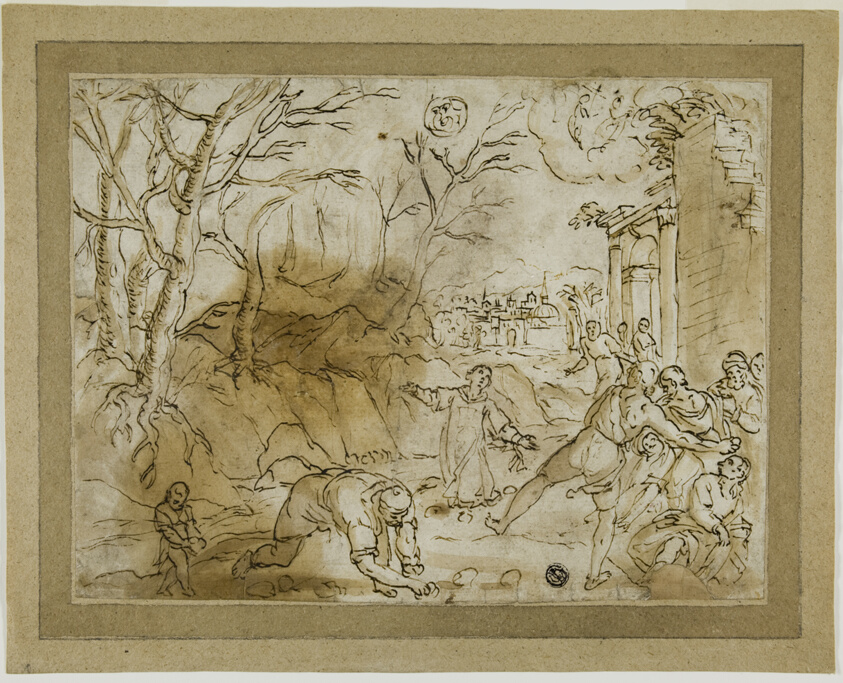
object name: Drawing and Watercolor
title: Stoning of Saint Stephen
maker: Italian, Genoese or Venetian; Late 16th century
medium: Pen and brown ink with brush and brown wash, and touches of graphite, on ivory laid paper, laid down on pale brown wove paper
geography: Italy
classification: ink with wash; drawings (visual works); prints and drawing